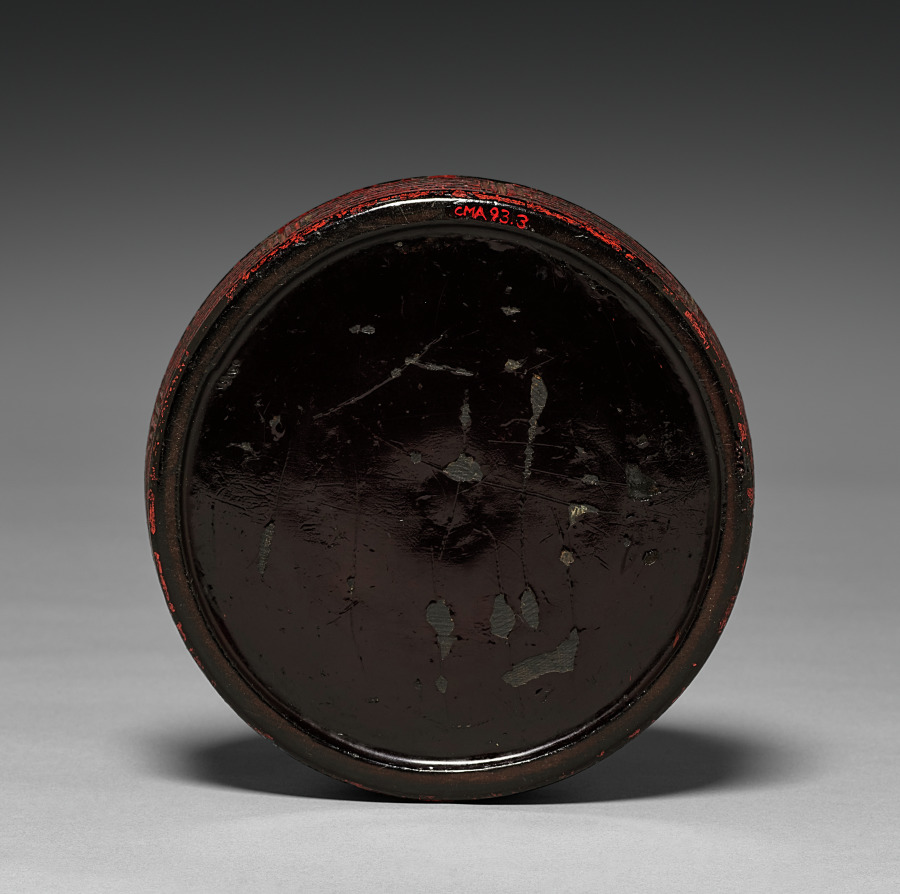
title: Incense Box (Kogo) with Camellia Design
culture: Japan, Muromachi period (1392–1573)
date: 1500s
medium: carved wood with black and red lacquer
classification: Lacquer